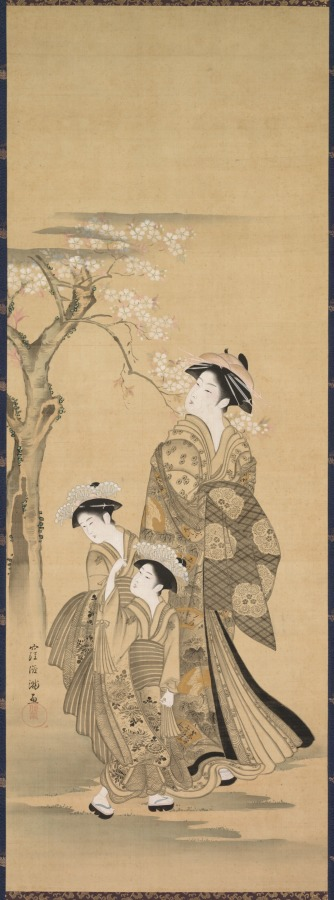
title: Woman and Two Children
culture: Japan, Meiji period (1868–1912)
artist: copy after Kubo Shunman (Japanese, 1757–1820)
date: early 1900s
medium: hanging scroll; color and gold on silk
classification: Painting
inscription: signed Kubo Shunman